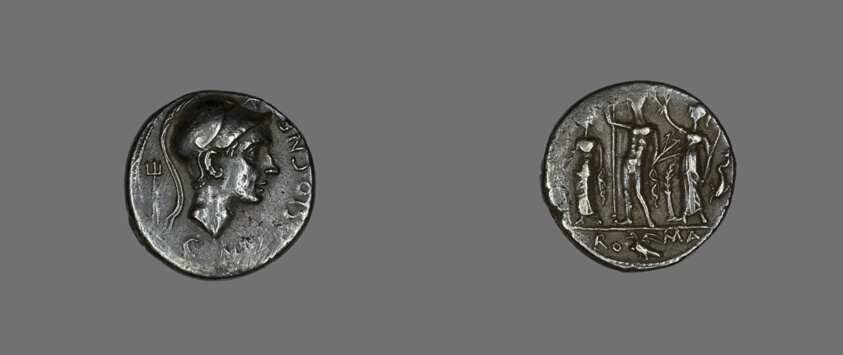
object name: Coin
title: Denarius (Coin) Depicting Scipio Africanus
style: roman (ancient, style or period), republic period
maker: Roman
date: 112-111 BCE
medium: Silver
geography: Roman Empire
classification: coin; ancient art